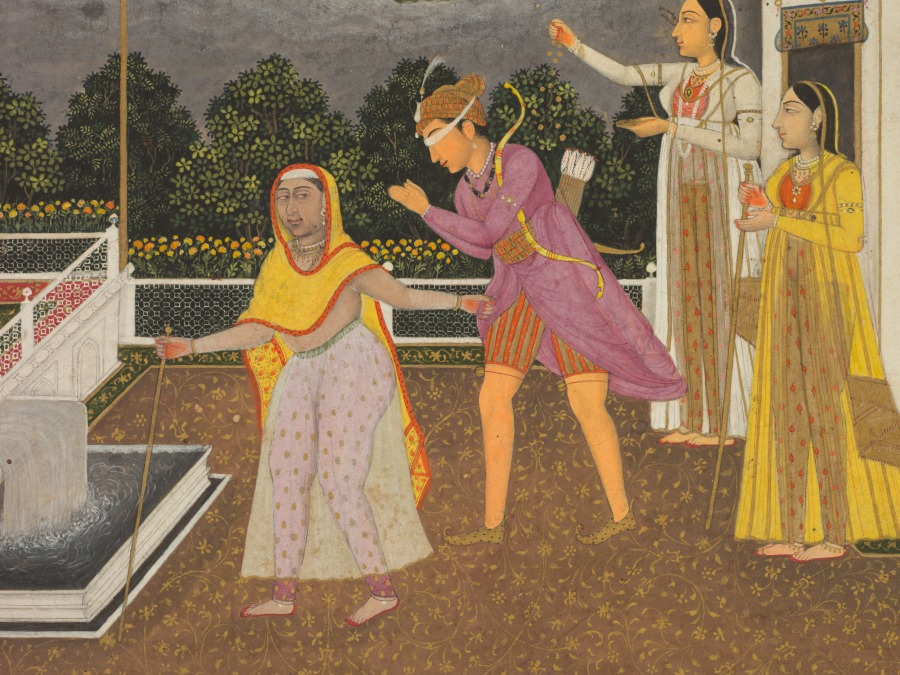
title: A blindfolded suitor is brought before a princess (recto)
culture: India, Lucknow, Mughal, 18th century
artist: Fayzullah (Indian, active c. 1730–1765)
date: 1755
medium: Gum tempera and gold on paper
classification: Painting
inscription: signed in two places: on capital of central pillar: 'amal - i Fayzullah ("the workof Fayzullah"), and below: bi - qalam i Fayzullah Musavvir walad - i Faqirullah Musavvir dar sanna 1755 ("by the pen of Fayazullah the painter son of Faqirullah the painter in the the year 1755")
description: In a scene set on a carpeted terrace in the women’s palace quarters, an older woman of the harem drags a young prince with a white blindfold over his eyes before a princess grasping a document. Such a scene evokes a literary allusion of a princess who selects her suitor, but it also resonates with circumstances at the Mughal court. Signed and dated by the artist, this painting was completed at a time when powerful women wielded control over the emperor, and Ahmad Shah Bahadur (reigned 1748–54), son and successor of Muhammad Shah, had been blinded and deposed less than one year before.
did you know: A gigantic crocodile swallows a horse and rider attempting to cross the river.